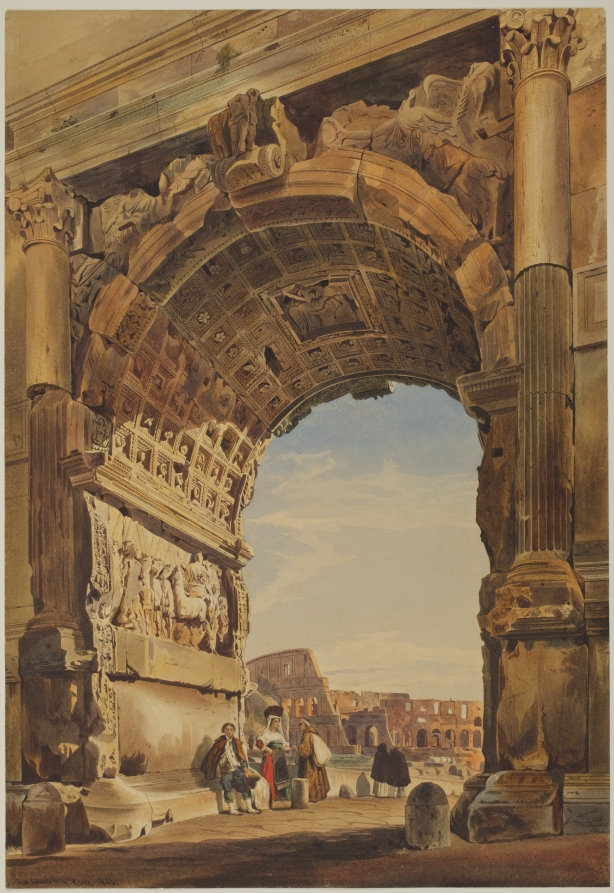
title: The Arch of Titus and the Coliseum, Rome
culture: England, 19th century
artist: Thomas Hartley Cromek (British, 1809–1873)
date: 1846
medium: watercolor with black ink and graphite underdrawing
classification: Drawing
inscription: signed, inscribed, and dated, in black ink, at lower left: T.H. CROMEK.f.ROME. 1846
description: Thomas Hartley Cromek’s detailed renderings of classical ruins in Italy and Greece appealed to British visitors seeking mementos of their Grand Tour travels. Like many artists of his generation, Cromek went to Italy as a young man and settled in Rome, remaining abroad for 20 years and establishing a solid reputation as a watercolorist. Periodically he returned to England to court potential patrons and sell his work. Upon one of these journeys home, he was summoned to Buckingham Palace where Queen Victoria and Prince Albert purchased several watercolors. This drawing exemplifies the topographical accuracy and clarity of Cromek’s most successful work.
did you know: According to a ledger recording Thomas Hartley Cromek's sales, the artist sold 13 versions of the image seen in this drawing.